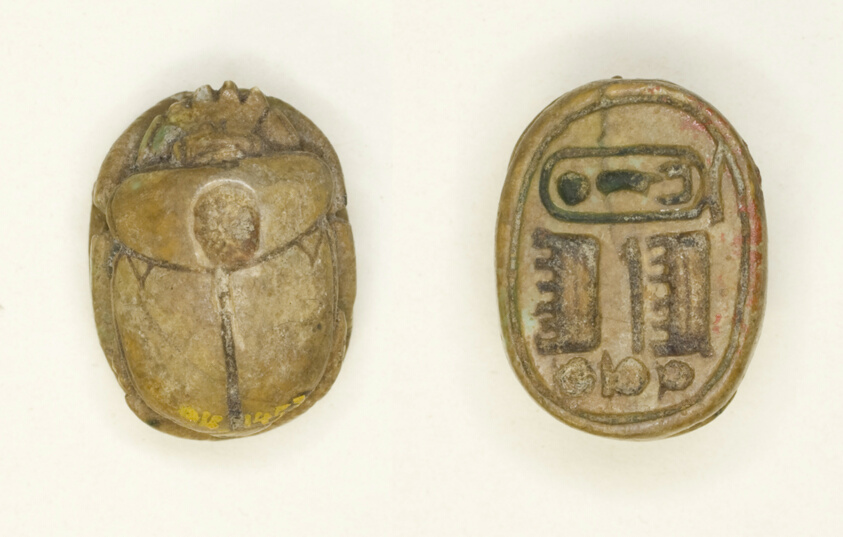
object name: Costume and Accessories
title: Scarab: Maatkara (Hatshepsut)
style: new kingdom, eighteenth dynasty, egyptian, ancient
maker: Egyptian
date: New Kingdom, Dynasty 18, Reign of Hatshepsut (about 1473–1458 BCE)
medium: Steatite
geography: Egypt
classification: scarab; ancient art; costume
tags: Hieroglyphs, cartouches, insects, pharaohs